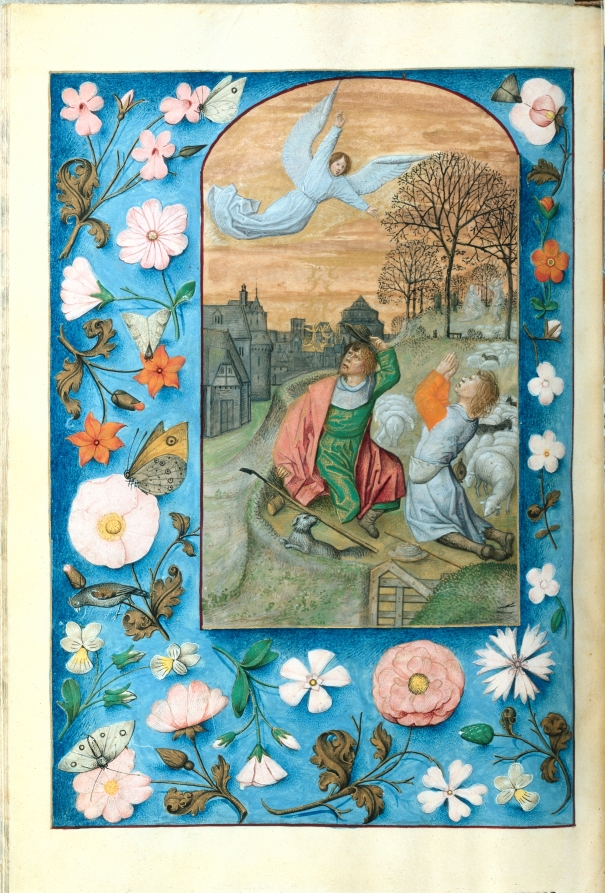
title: Hours of Queen Isabella the Catholic, Queen of Spain: Fol. 131v, Annunciation to the Shepherds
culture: Flanders, Ghent and Bruges, late 15th century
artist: Master of the First Prayerbook of Maximillian (Flemish, c. 1444–1519)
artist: and Associates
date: c. 1500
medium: ink, tempera, and gold on vellum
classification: Bound Volume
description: This manuscript was illuminated by a circle of at least five highly organized manuscript painters active in the Flemish cities of Ghent and Bruges. The principal illuminator was Alexander Bening, who painted the majority of the book's miniatures. Manuscripts produced by this circle of artists are renowned for the decoration of their borders, which typically feature a rich variety of realistically-painted flowers, birds, and butterflies. This prayer book, called a book of hours, was intended not for a cleric, but for the private devotions of a lay person-in this case, Isabella the Catholic, Queen of Spain (1451-1504). Isabella's coat of arms embellishes the book's frontispiece. It is unlikely that the book was commissioned by the Queen herself; rather, she probably received it as a diplomatic gift from someone courting her patronage, perhaps Cardinal Francisco Jimenez de Cisneros. A Franciscan friar, Jimenez was dependent upon Isabella for his advancement, first to the post of Queen's confessor in 1492, and then to Archbishop of Toledo in 1495.